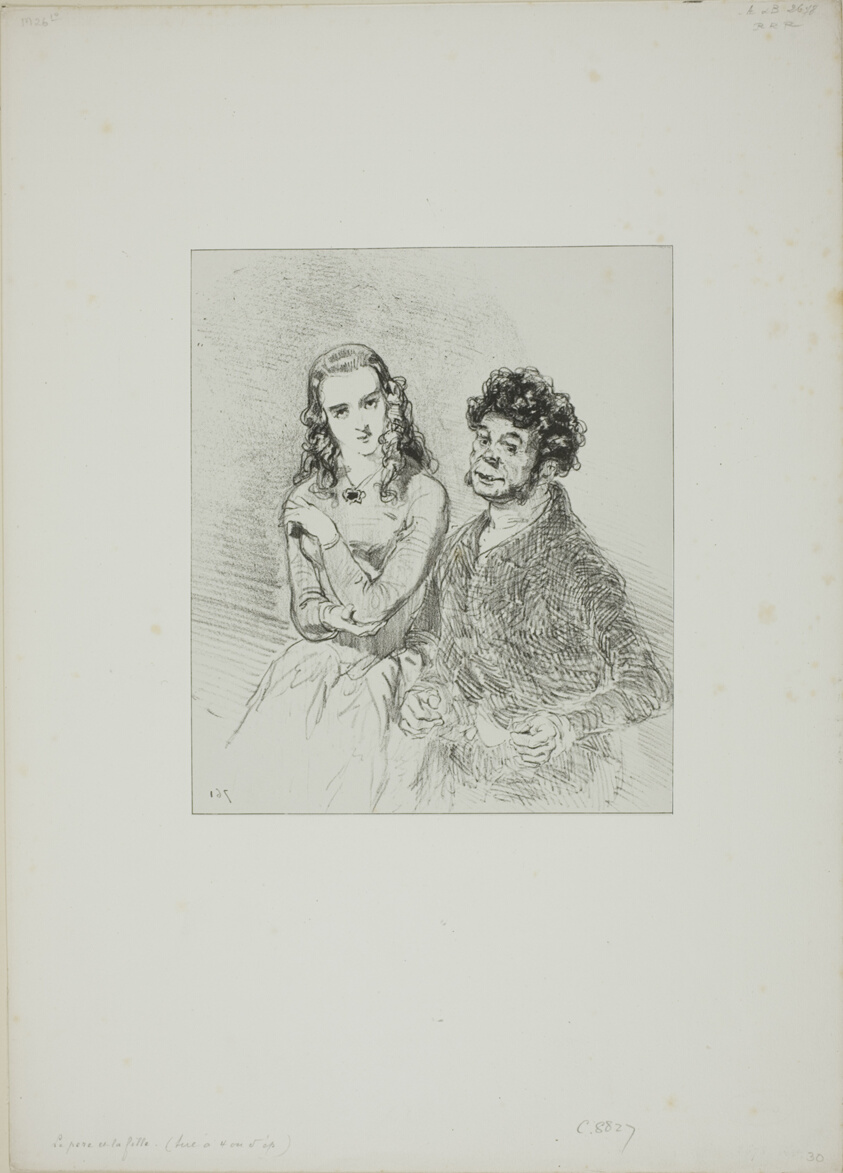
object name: Print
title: Untitled (Father and Daughter)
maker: Paul Gavarni (French, 1804-1866)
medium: Lithograph in black on light gray China paper, laid down on ivory wove paper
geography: France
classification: lithograph; print; prints and drawing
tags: fathers, daughters, families